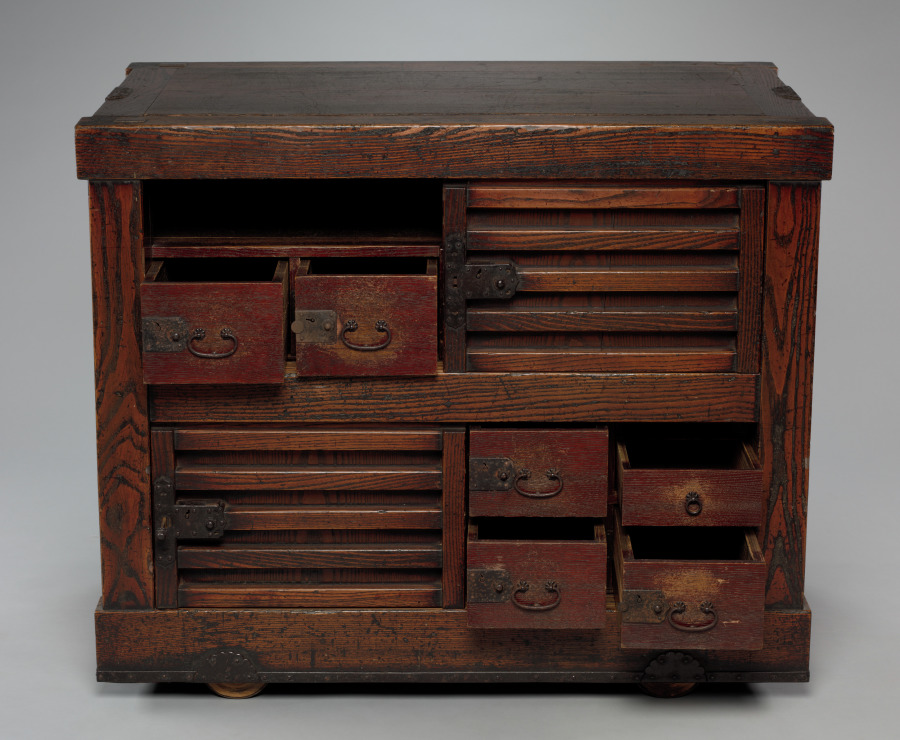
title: Chest on Wheels (Kurumadansu)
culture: Japan, Edo period (1615–1868)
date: 1715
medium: wood with iron fittings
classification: Furniture and woodwork